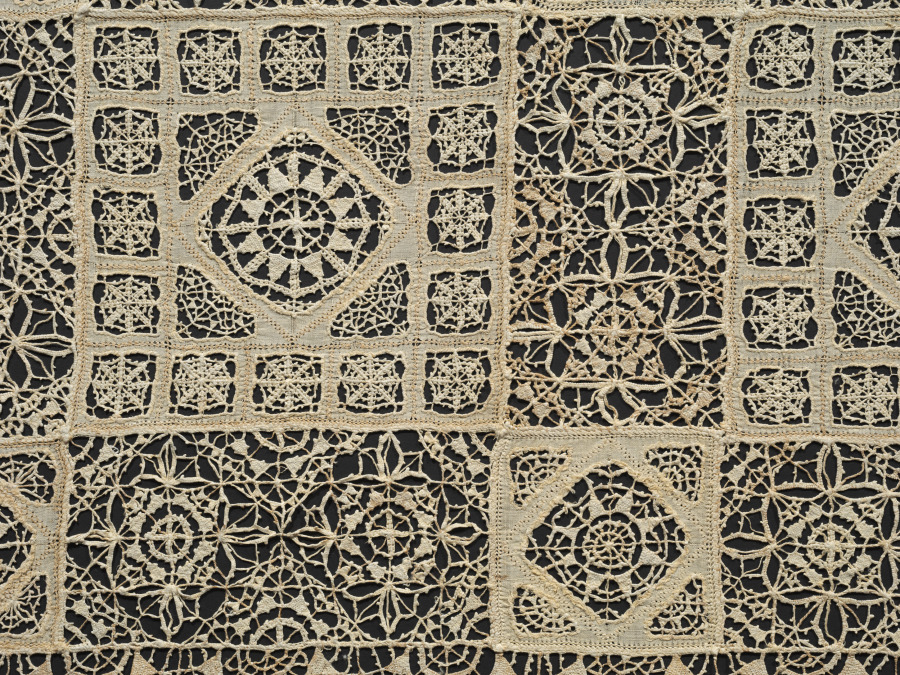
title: Lace Cloth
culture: Italy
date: 1560–1600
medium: Linen; needle lace (cutwork and reticella)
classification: Lace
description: Consisting of more than 80 squares of cutwork (a cut and embellished linen ground) and rectangles of reticella (needle lace), this luxurious cover could have been made by a single person or several people who divided the work. Close looking reveals that the cloth is made with threads of two very slightly different colors: bleached and unbleached linen. Together the sections resemble snowflakes, which are of similar shape and size but vary subtly from one another. The perplexing dark stitches in the upper left corner do not repair damage, and might be the maker’s signature.